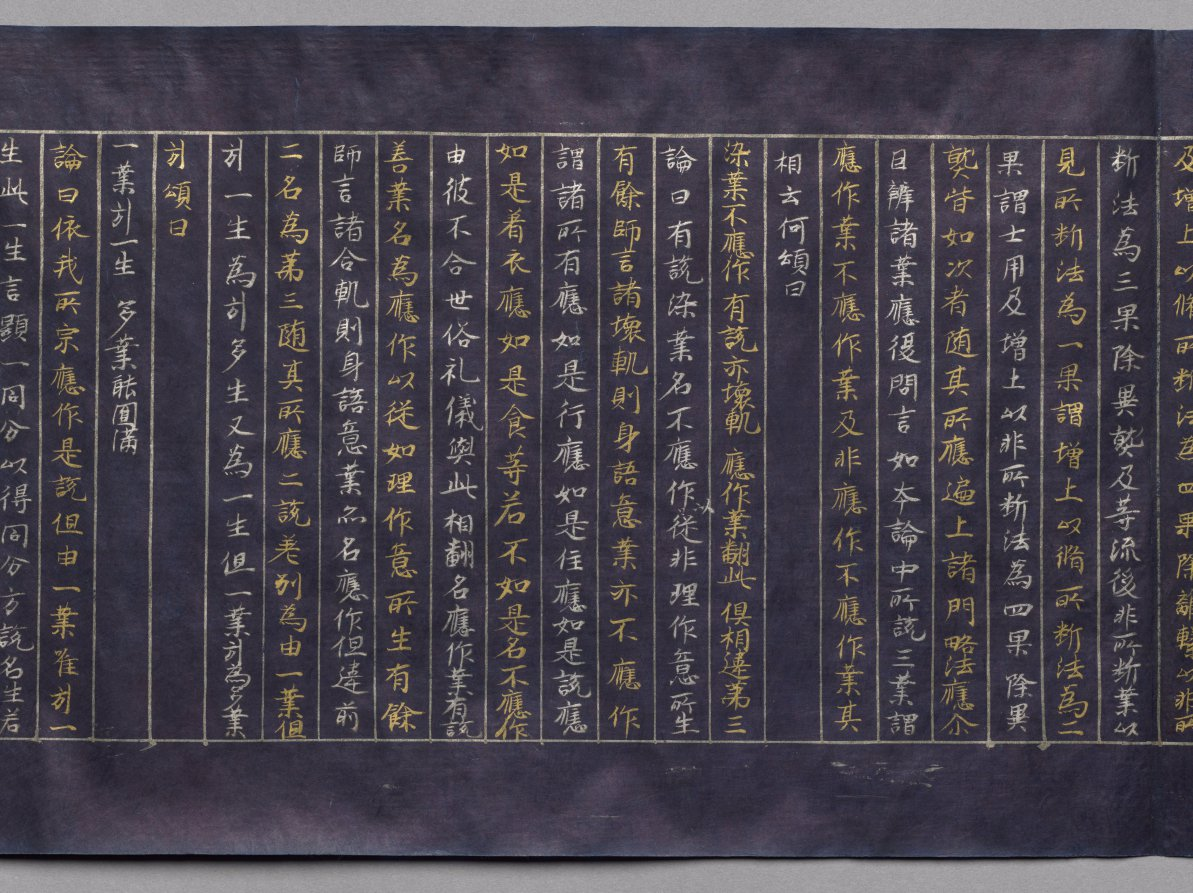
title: Meta-Discourse on the Teachings from the Treasury (Abidharmakosha-Bhashya)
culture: Japan, Heian period (794–1185)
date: 1100s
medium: handscroll; gold and silver on indigo-dyed paper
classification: Manuscript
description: This religious text relates some of the teachings of the great fourth-century Indian Buddhist scholar Vasubhandhu. The text analyzes human consciousness in its relationship to the environment and transformations that occur during meditation. This scroll is the 17th part of a 30-part translation of the text by Xuanzang, an eminent seventh-century Chinese monk.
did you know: The frontispiece depicts the Buddha Shakyamuni preaching in a paradisical landscape.